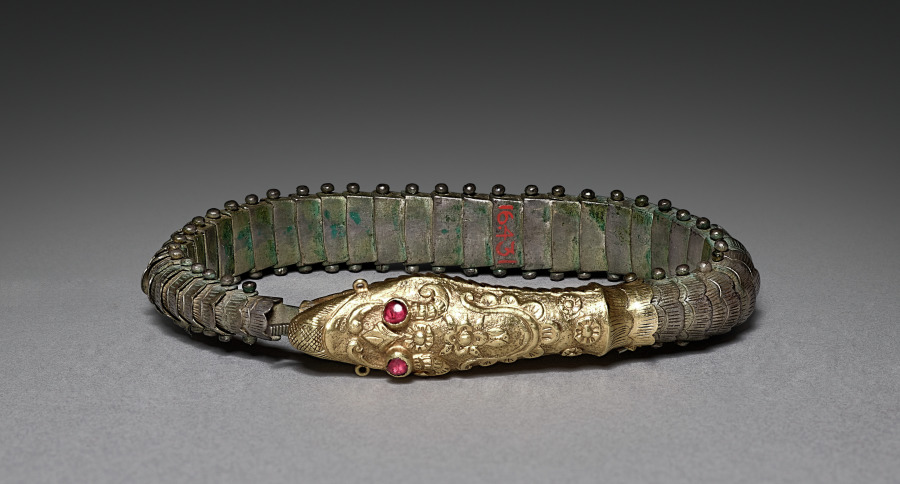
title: Bracelet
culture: Siam (?)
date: 1800s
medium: silver gilt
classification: Jewelry